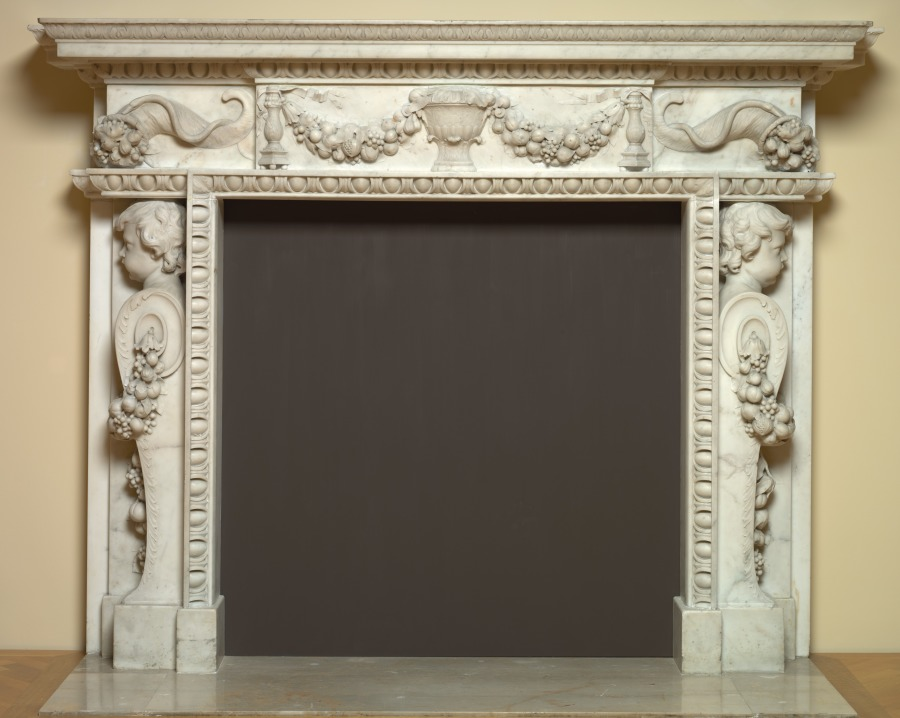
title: Mantel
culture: England, 18th century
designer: after Inigo Jones (English, 1573–1652)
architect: probably by William Kent (British, 1685–1748)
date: c. 1730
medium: marble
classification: Furniture and woodwork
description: The cornucopias and scroll-shaped brackets capped by the bust of the youthful Roman god, Mercury, were inspired by the work of Inigo Jones, one of the first British architects of great renown. The mantel was originally installed in Wanstead House, formerly located on the outskirts of London. Working opposite the architect, Colen Campbell (1676–1729), William Kent completed the interior decoration of the estate and likely produced this mantel as well. When Wanstead House was pulled down in 1822, the Duke of Hamilton purchased the chimney piece and three others from Wanstead House to display in his own home near Glasgow, Scotland.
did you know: Here the presence of the Roman god of trade and abundance (Mercury) within the decorative scheme of this mantel alludes to prosperity and bounty.